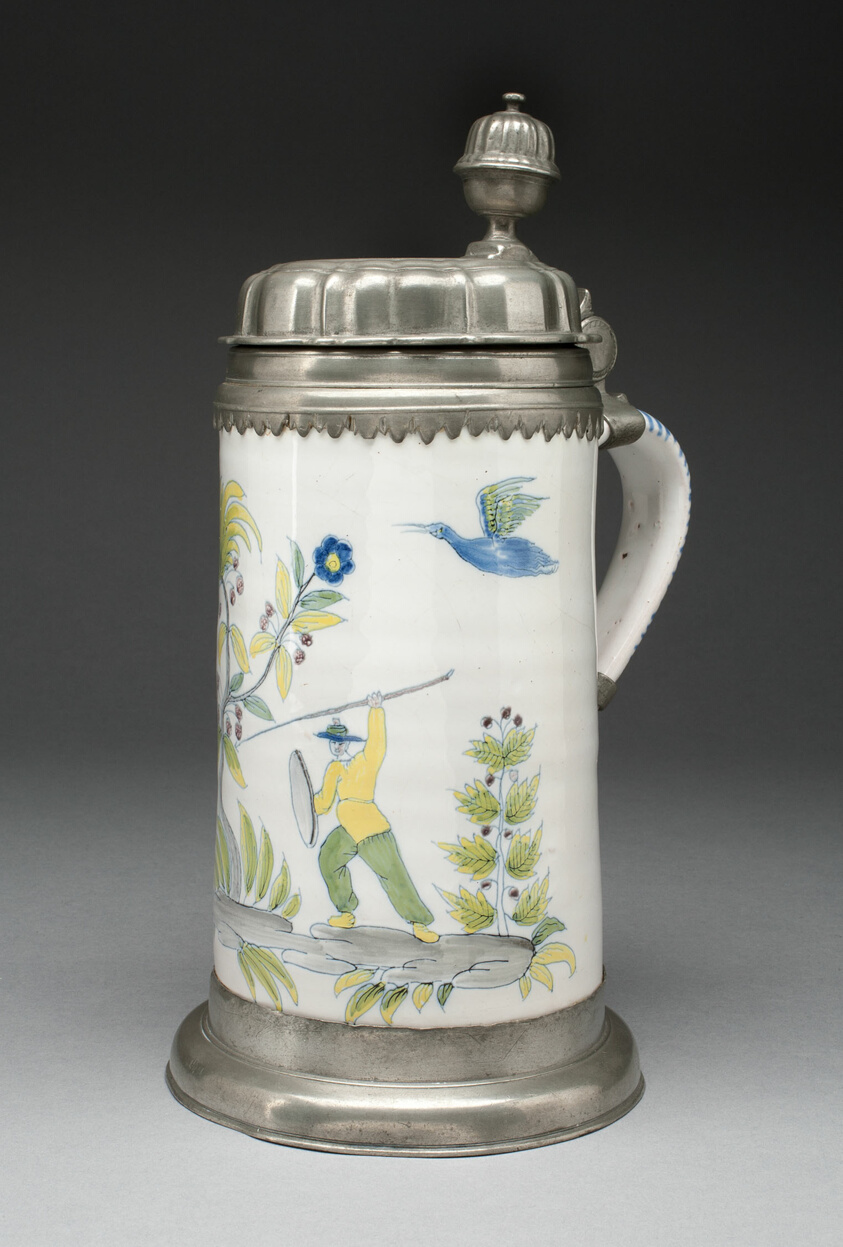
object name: Ceramics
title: Tankard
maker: Germany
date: c. 1720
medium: Tin-glazed earthenware (faience) and pewter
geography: Germany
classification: ceramics; european decorative arts